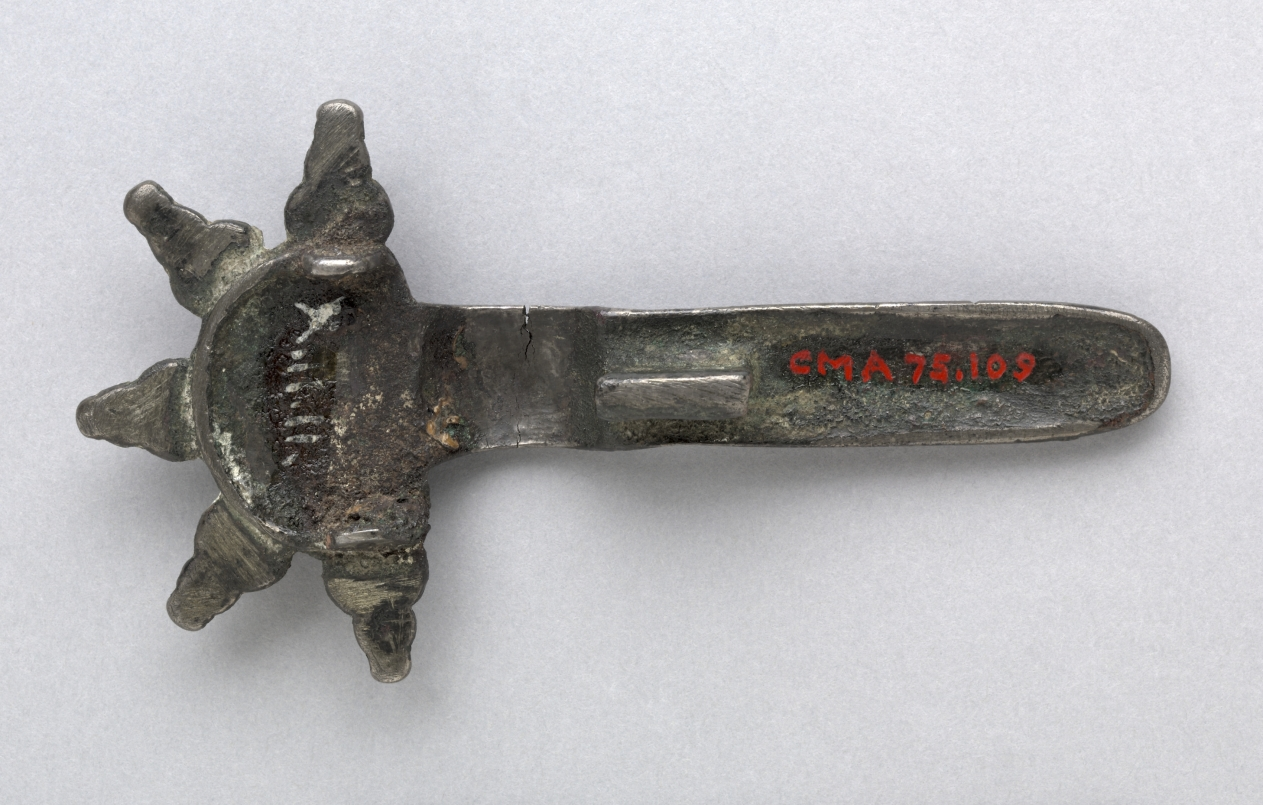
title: Fibula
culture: Frankish, Migration period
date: 500s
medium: silver with garnets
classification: Jewelry